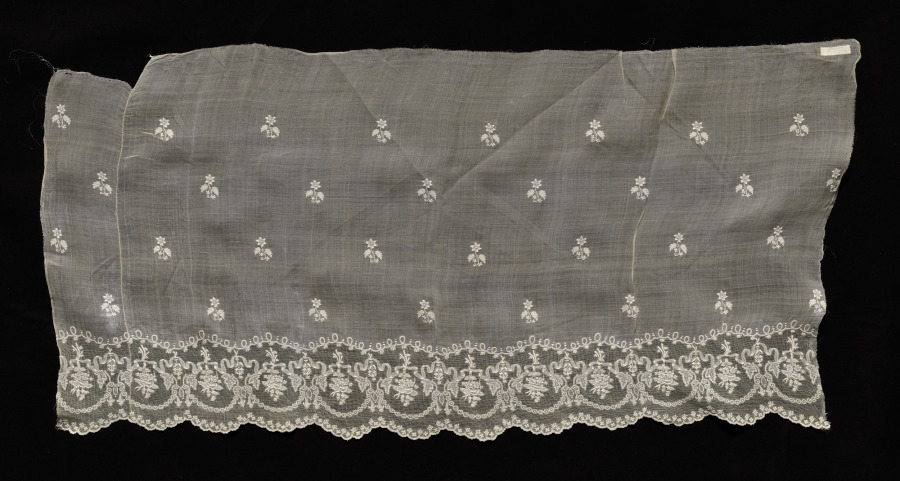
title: Blouse in four pieces (sleeve)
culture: Philippines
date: 1800s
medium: Plain weave piña; needle lace (drawnwork) and white cotton embroidery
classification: Embroidery